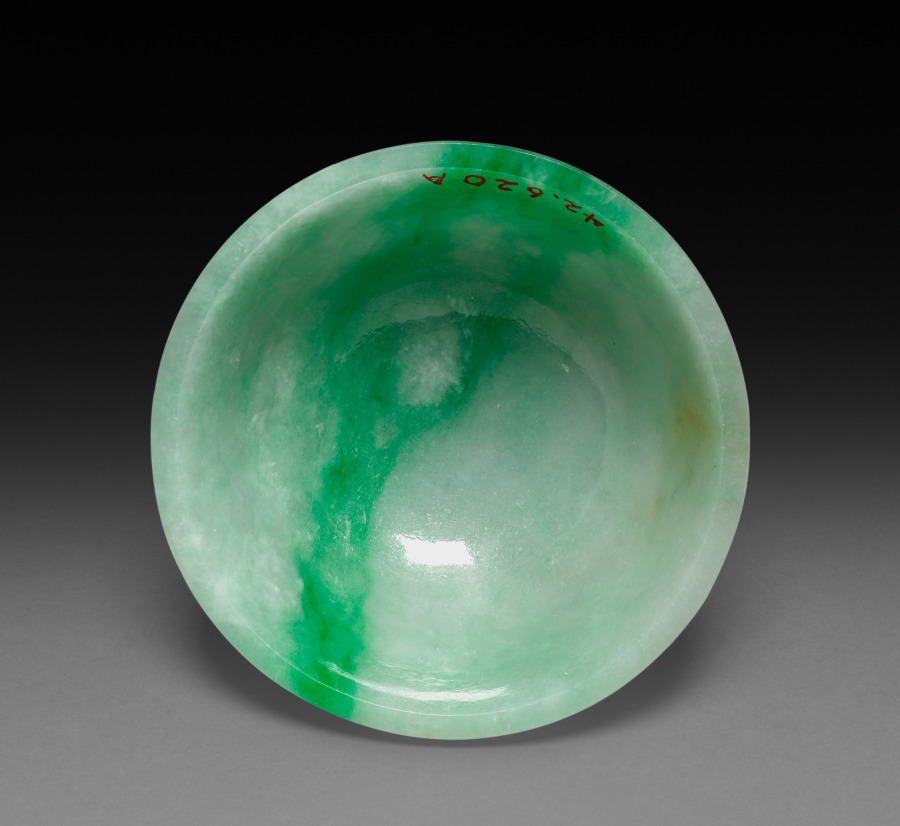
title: Incense Burner (lid)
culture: China, Qing dynasty (1644–1911), Qianlong reign (1736–95)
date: 1736–95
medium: jade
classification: Jade